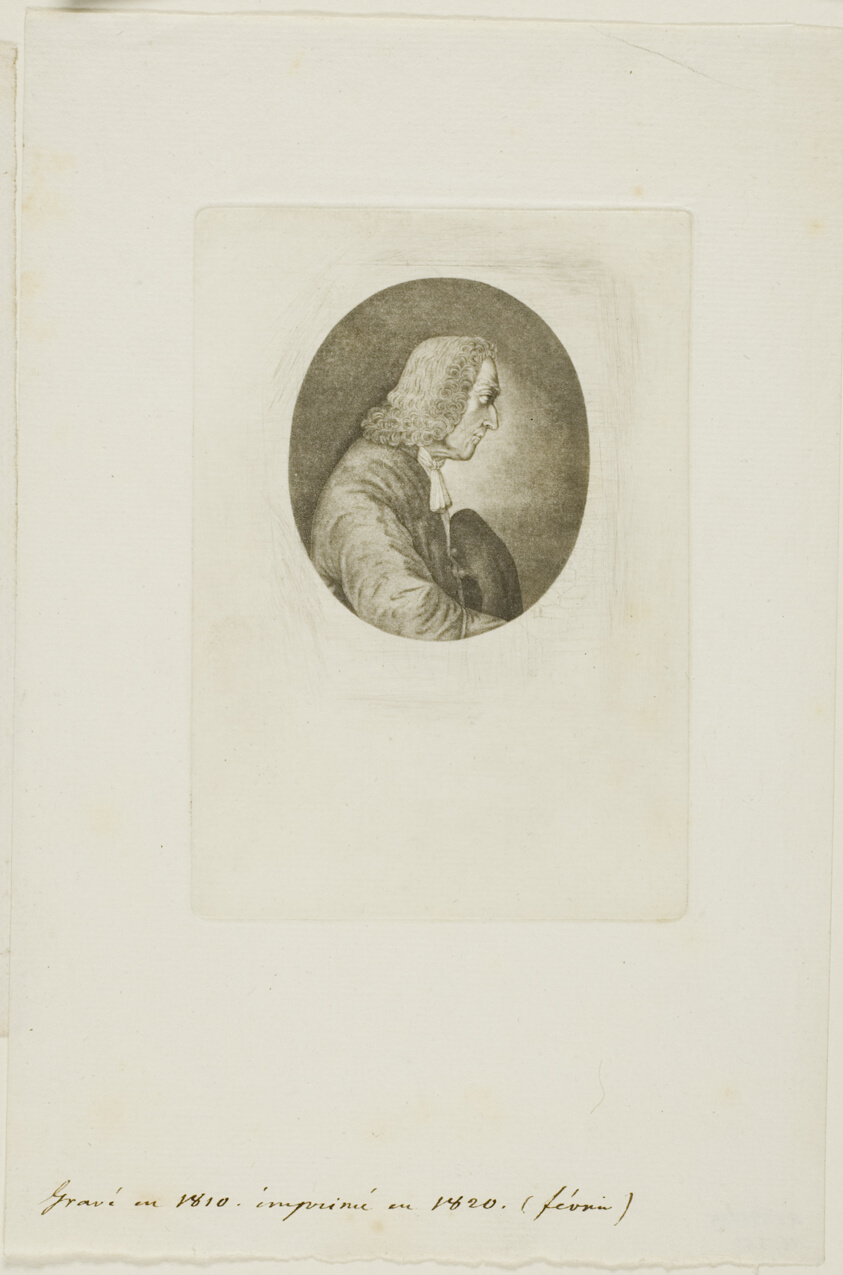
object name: Print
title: Jean Joseph Grateloup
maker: Jean-Baptiste de Grateloup (French, 1735-1817); Jean Pierre Sylvestre (French)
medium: Engraving on paper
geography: France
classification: aquatint; print; prints and drawing